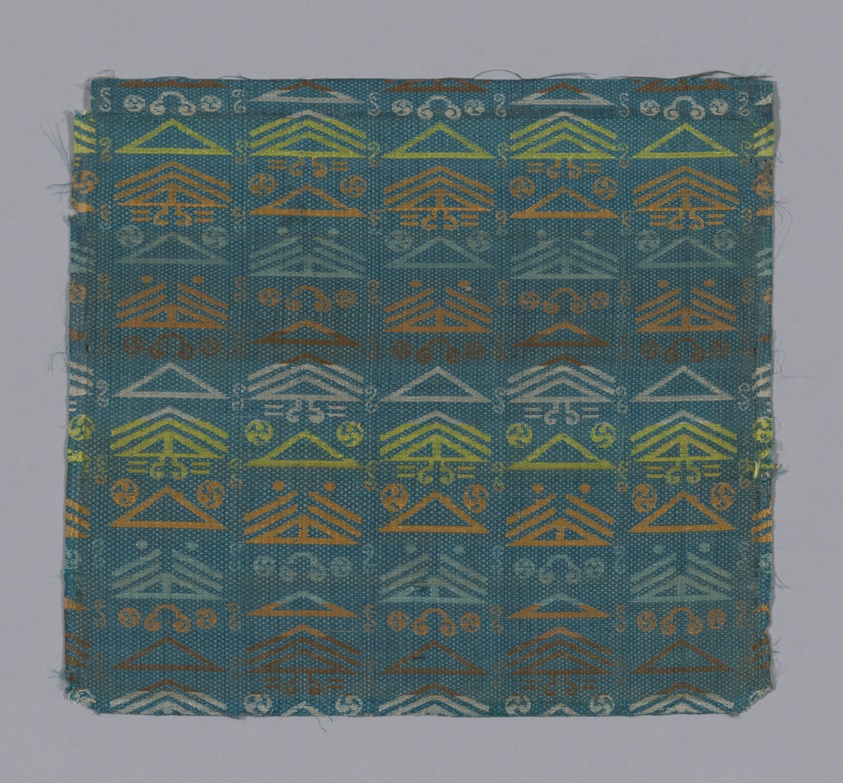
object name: Textile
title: Fragment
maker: Japan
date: late Edo period (1789–1868)/ Meiji period (1868–1912), 19th century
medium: Fancy compound twill, silk.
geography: Japan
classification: textile; weaving